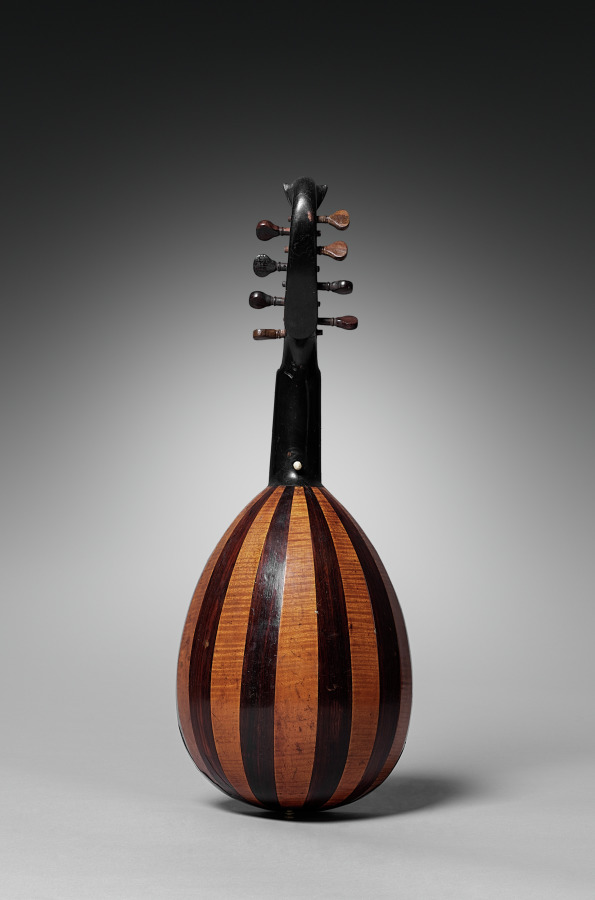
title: Mandore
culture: probably France, 19th century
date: c. 1800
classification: Musical Instrument